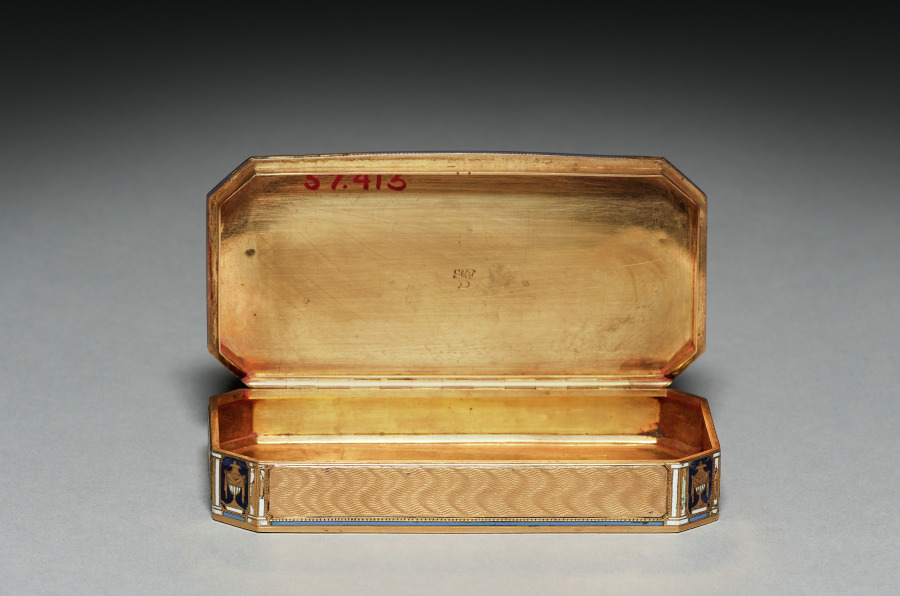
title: Box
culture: Switzerland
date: early 1800s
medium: gold and enamel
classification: Miscellaneous